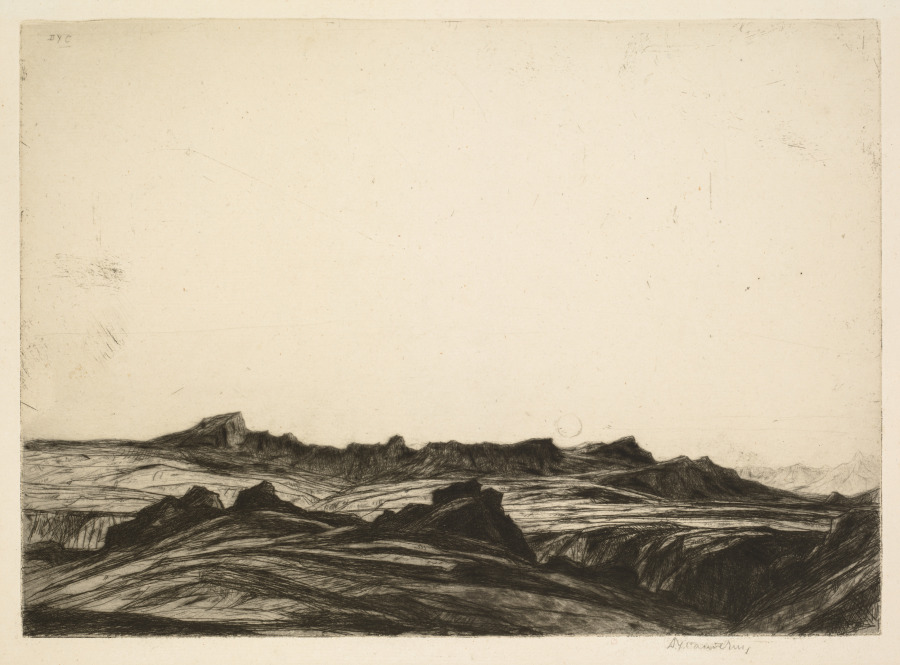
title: Arran Peaks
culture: Britain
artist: David Young Cameron (British, 1865–1945)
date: 1912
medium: Etching and drypoint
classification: Print